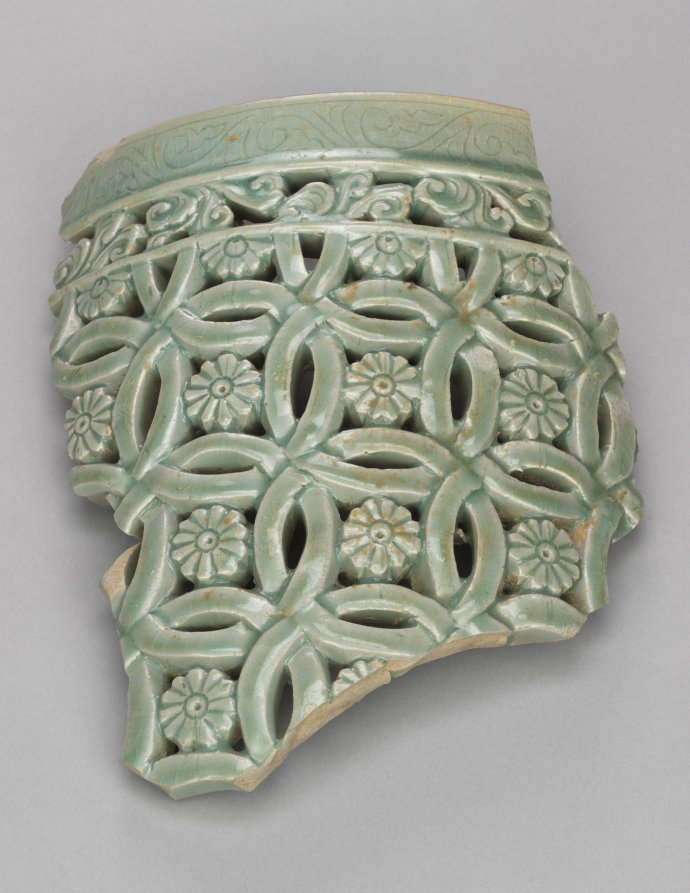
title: Fragment of Garden Stool with Openwork Design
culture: Korea, Goryeo dynasty (918–1392)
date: 1200s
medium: stoneware with celadon glaze, insiced scroll design, and carved openwork pattern with floral centers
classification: Ceramic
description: This ceramic fragment was part of a luxurious outdoor stool possibly used in a Goryeo elite's garden. A similar example, which maintains its pristine condition, can be found in collection of the National Museum of Korea. https://www.museum.go.kr/site/main/relic/search/view?relicId=7126.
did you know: This ceramic fragment was part of a luxurious outdoor stool. A similar example can be found in collection of the National Museum of Korea. https://www.museum.go.kr/site/main/relic/search/view?relicId=7126